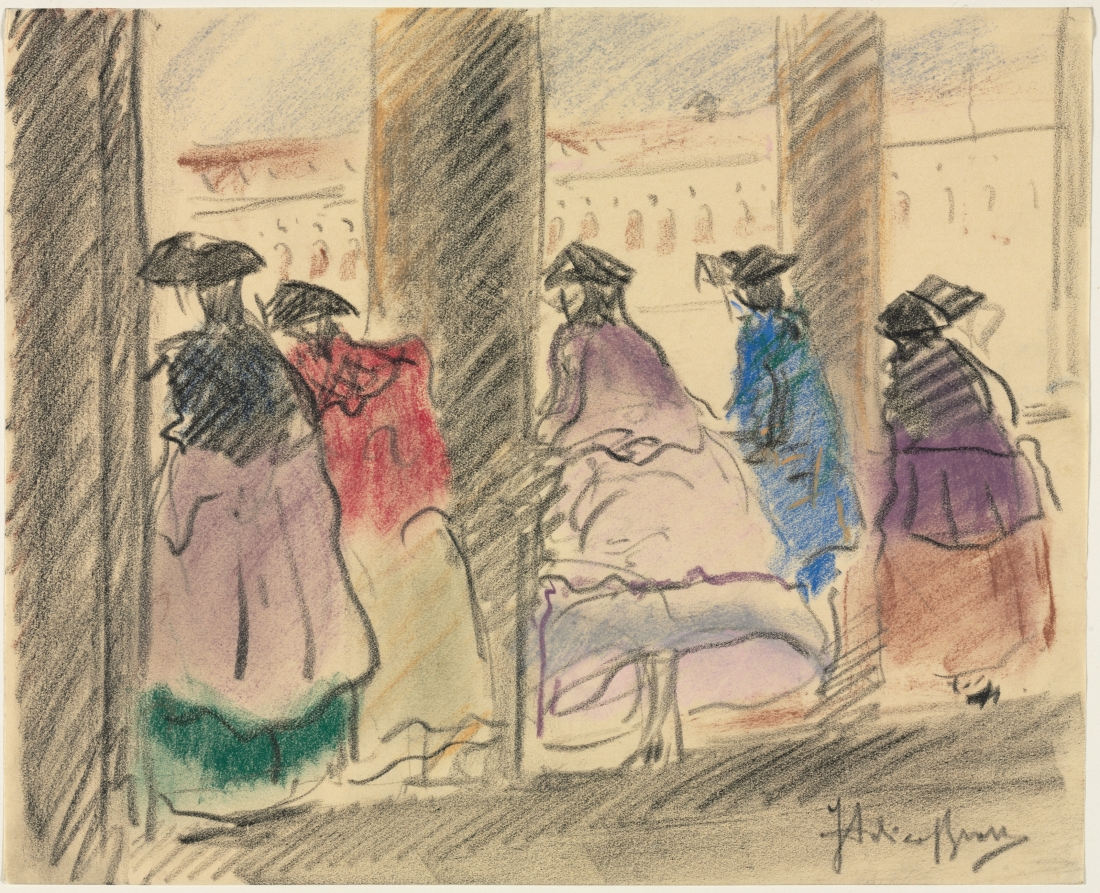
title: Figures in Masquerade on the Loggia of the Ducal Palace, Venice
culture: Italy, 20th century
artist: Italico Brass (Italian, 1870–1943)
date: 1925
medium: crayon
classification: Drawing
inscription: signed, lower right, in black crayon: Italico Brass